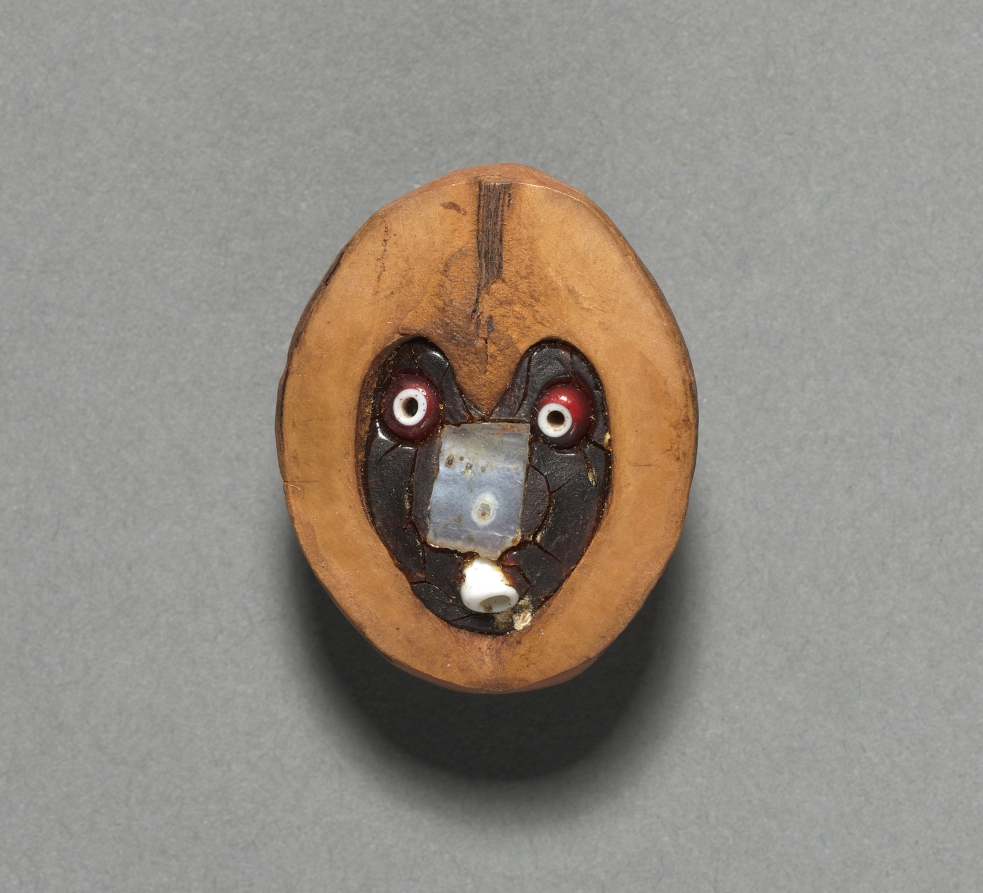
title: Gambling Dice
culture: California, Tulare, Unassigned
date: before 1917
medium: hollow shell, resin, glass beads, mica/seashell fragment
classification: Implements